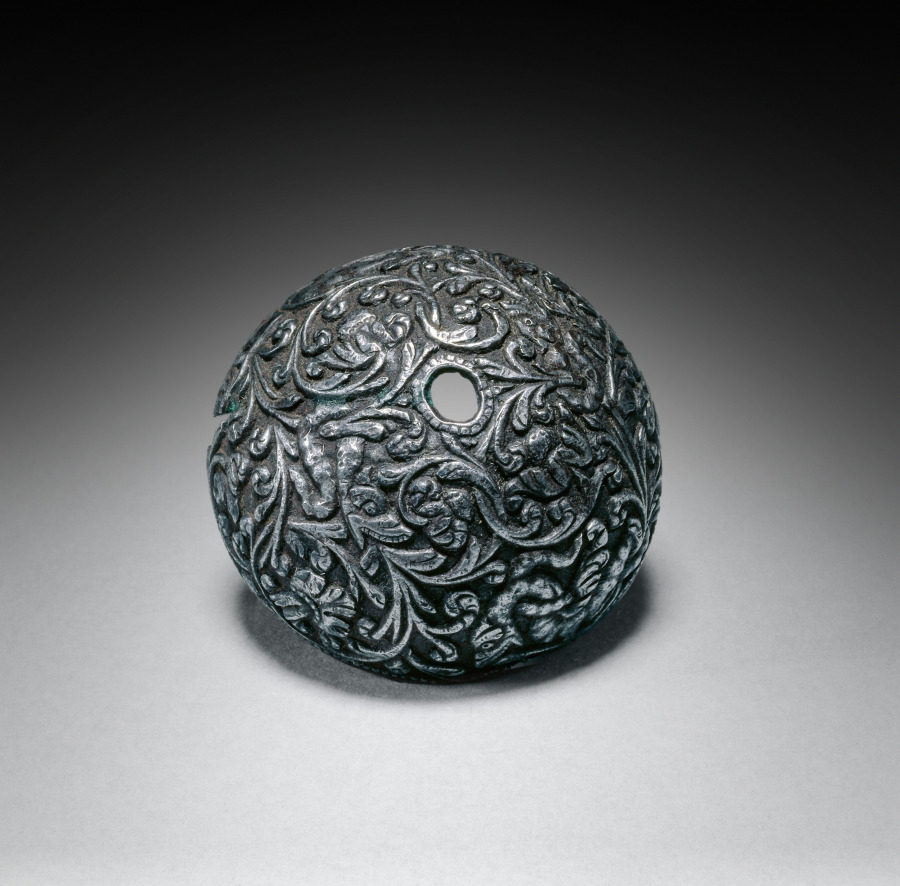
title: Butt-Cap from a Flintlock Pistol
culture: Italy, Brescia, 17th century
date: c. 1650–1660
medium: steel, chiseled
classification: Arms and Armor